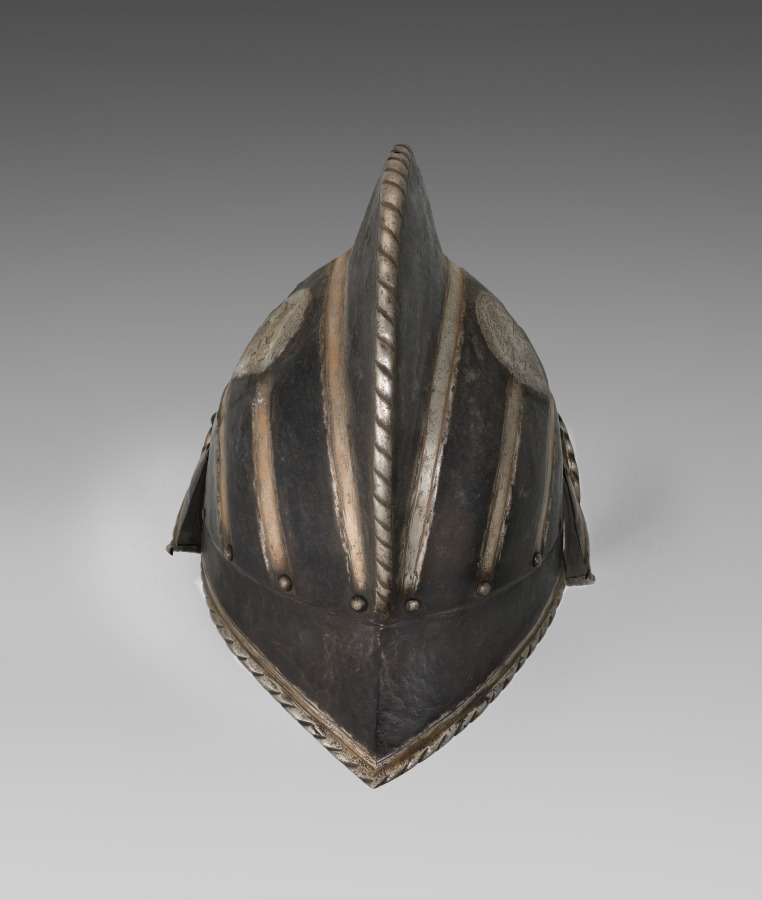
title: Black and White Burgonet (of the Civic Guard of Bologna)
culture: Italy, late 16th Century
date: c. 1580–1600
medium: steel with black paint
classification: Arms and Armor